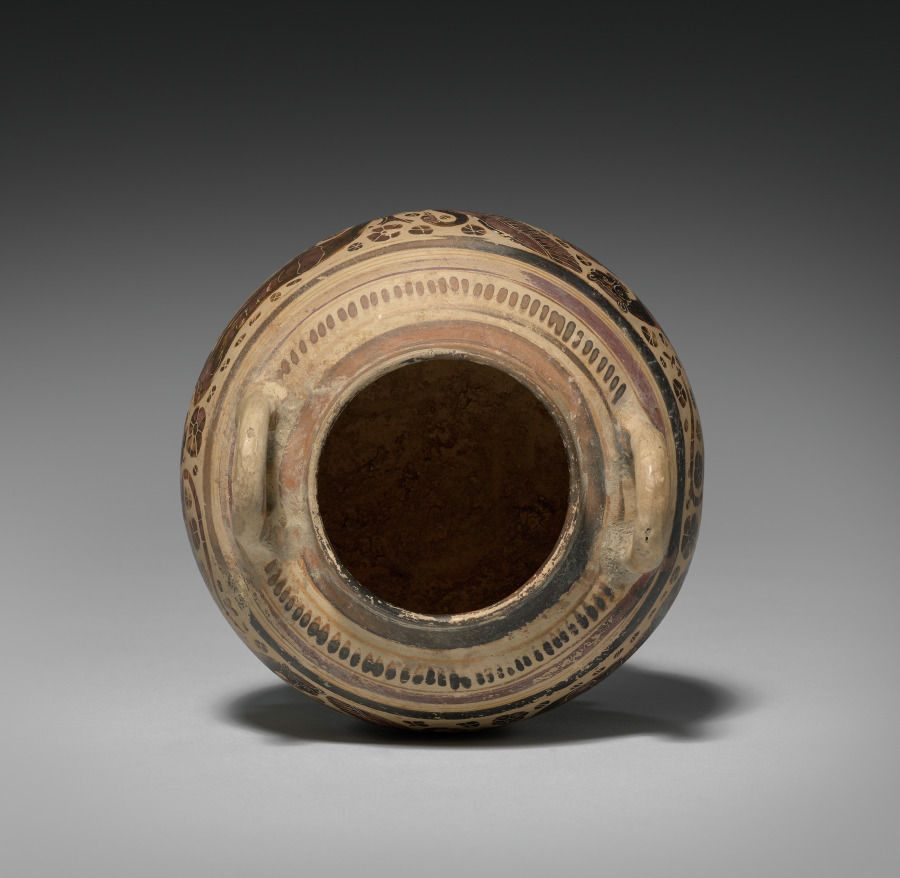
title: Corinthian Vase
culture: Greece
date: 600s BCE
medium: earthenware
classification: Ceramic